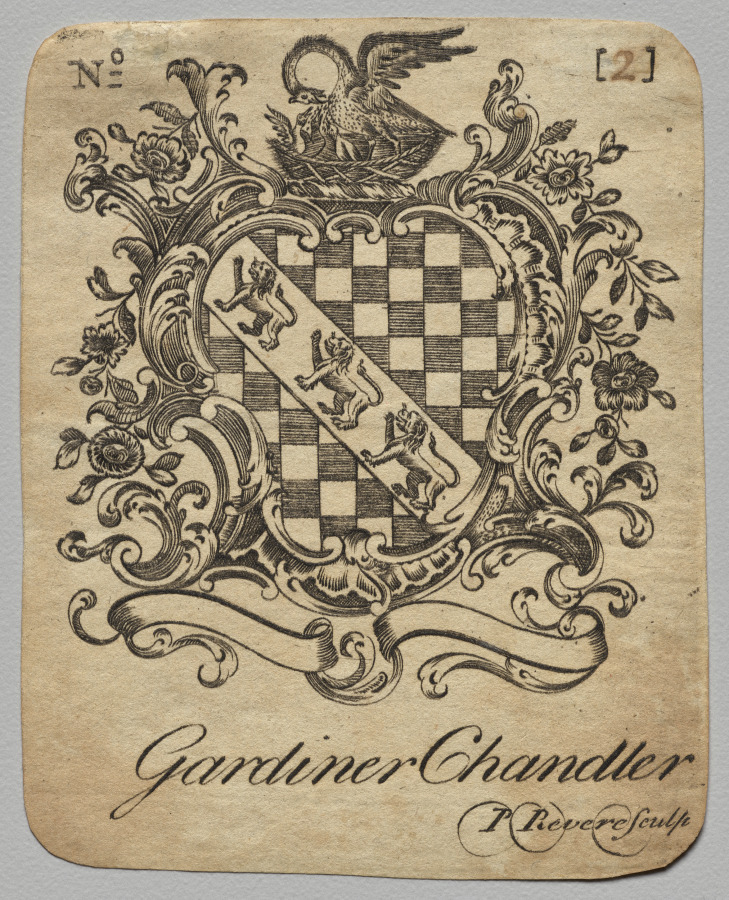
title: Bookplate: Coat of Arms with Gardiner Chandler inscribed below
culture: America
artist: Paul Revere II (American, 1735–1818)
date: c. 1750–1818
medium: engraving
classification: Print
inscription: Signed: "P. Revere, Sculp"